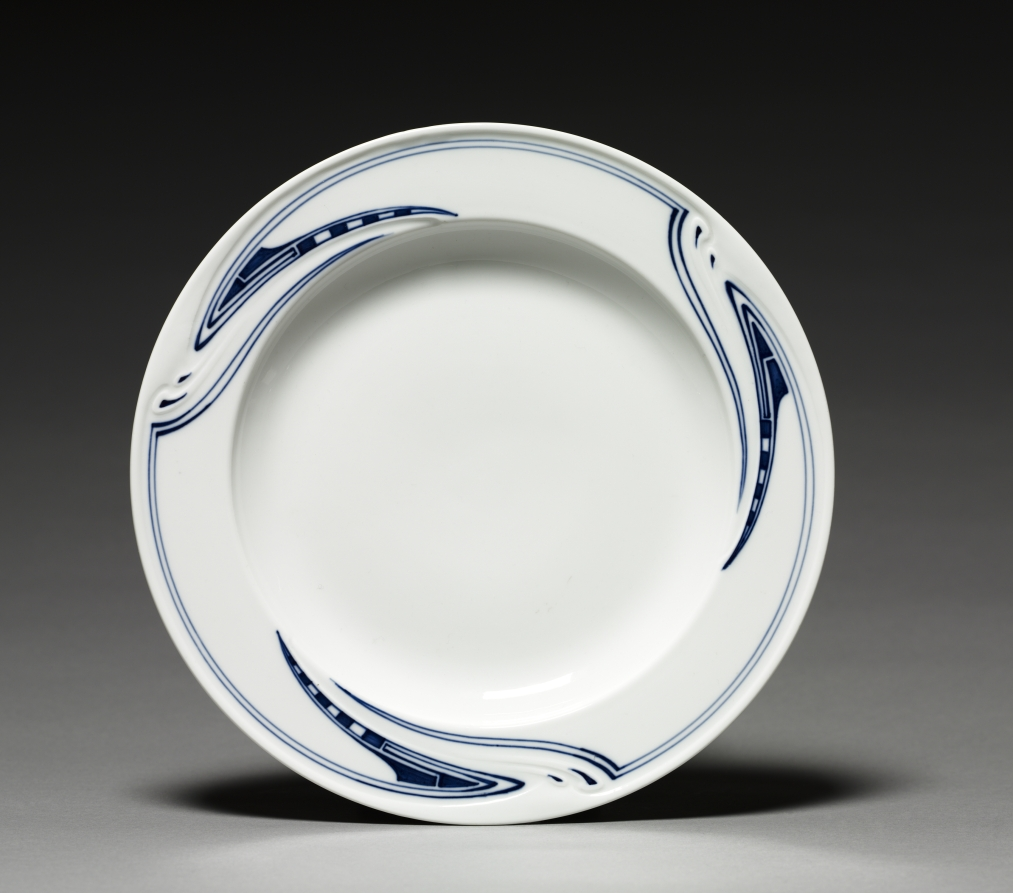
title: Plate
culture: Germany, Meissen, early 20th Century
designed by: Henry C. Van de Velde (Belgian, 1863–1957)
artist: firm of Meissen Porcelain Factory (German, est. c. 1710)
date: c. 1903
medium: porcelain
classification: Ceramic